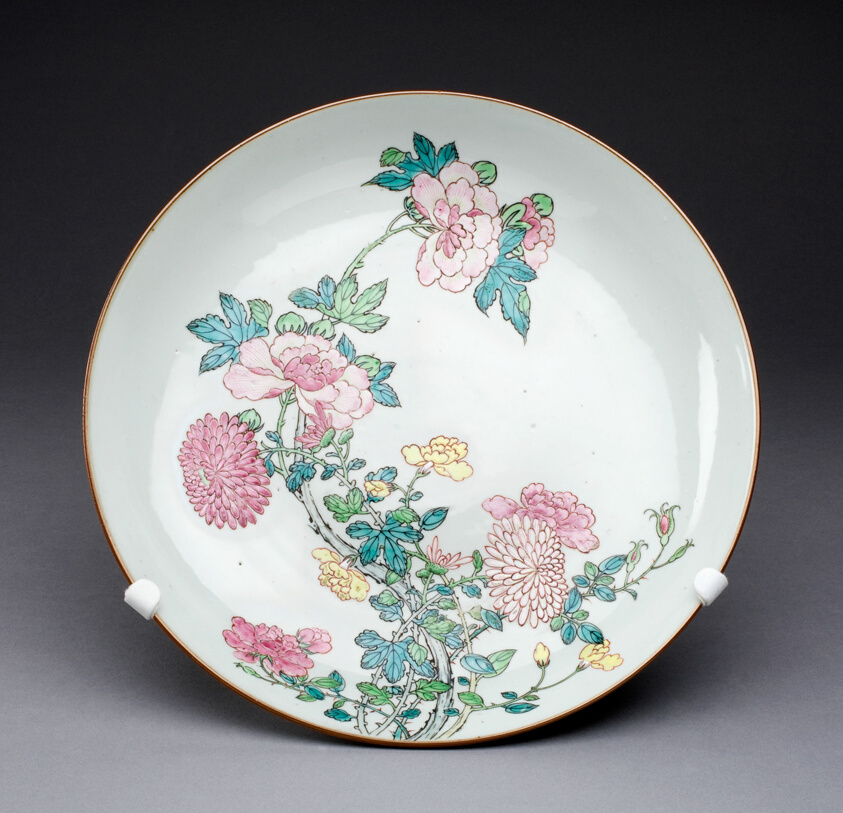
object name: Ceramics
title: Dish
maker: China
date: c. 1725, Qing Dynasty (1644–1911), Yongzhen period (1723–1735)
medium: Hard-paste porcelain and polychrome enamels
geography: China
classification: dish (vessel); ceramics